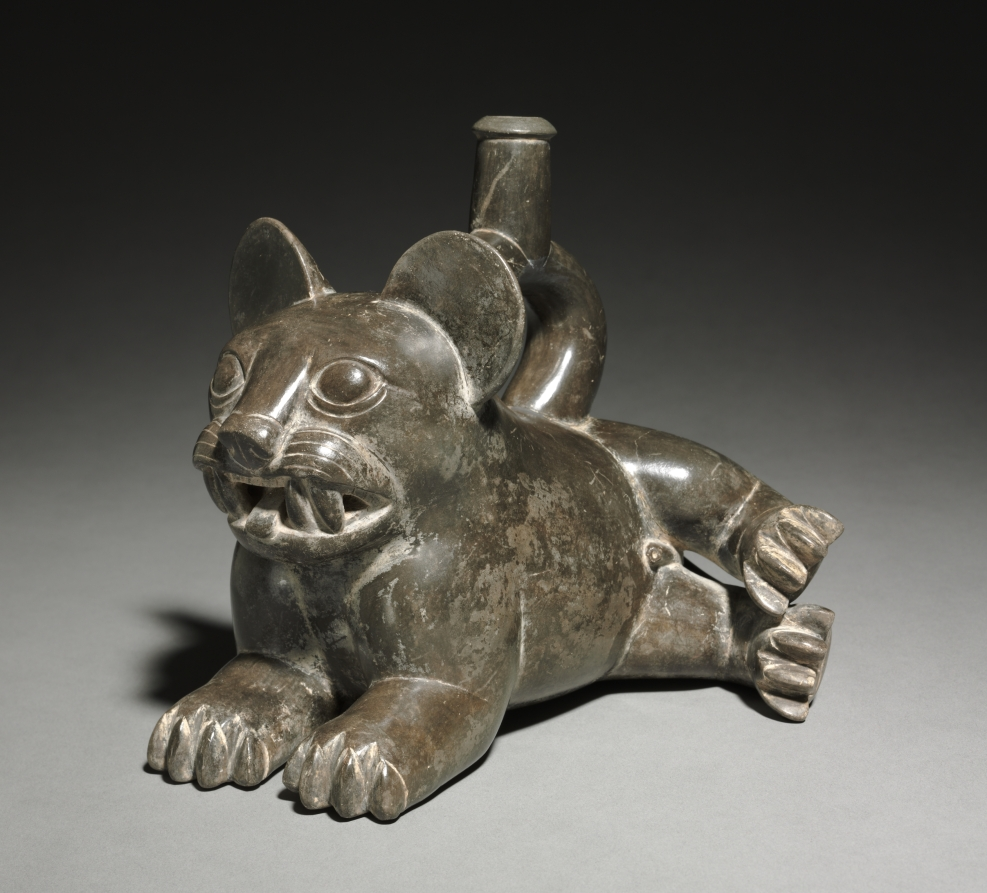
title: Feline Vessel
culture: Central Andes, North Coast, Moche people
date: 200–850 CE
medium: ceramic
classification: Ceramic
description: This darkware vessel is early Moche and demonstrates the transition from earlier North Coast cultures, which used smudge firing and post-fire pigmentation, to Moche times, which saw the adoption of new, higher-oxygen firing technologies and the use of slips applied before firing.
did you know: The Moche were known for their fine animal representations.